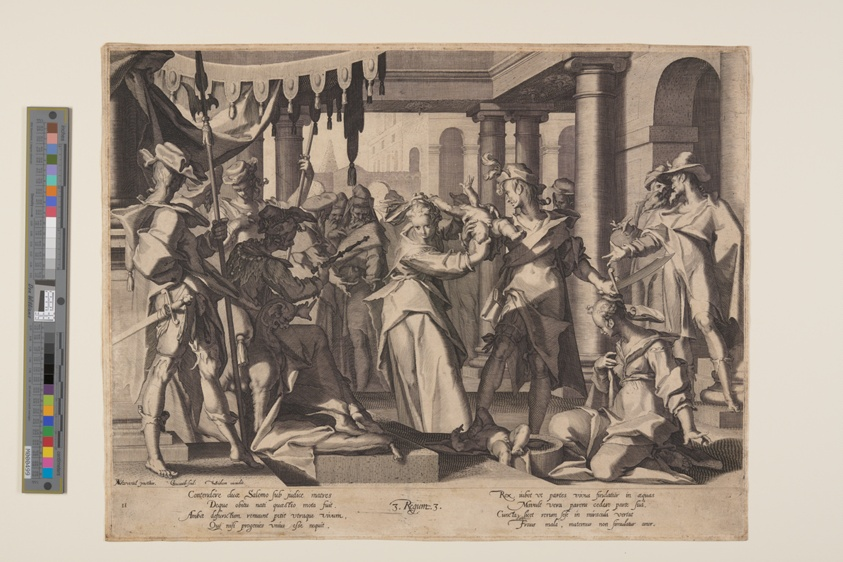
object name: Print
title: Judgment of Solomon, plate 2 from Thrones of Justice (Thronus Iustitiae)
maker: Willem van Swanenburgh (Dutch, 1580–1612); after Joachim Wtewael (Dutch, 1566–1638)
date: 1606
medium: Engraving on ivory laid paper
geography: Netherlands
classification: print; paper; prints and drawing; engraving